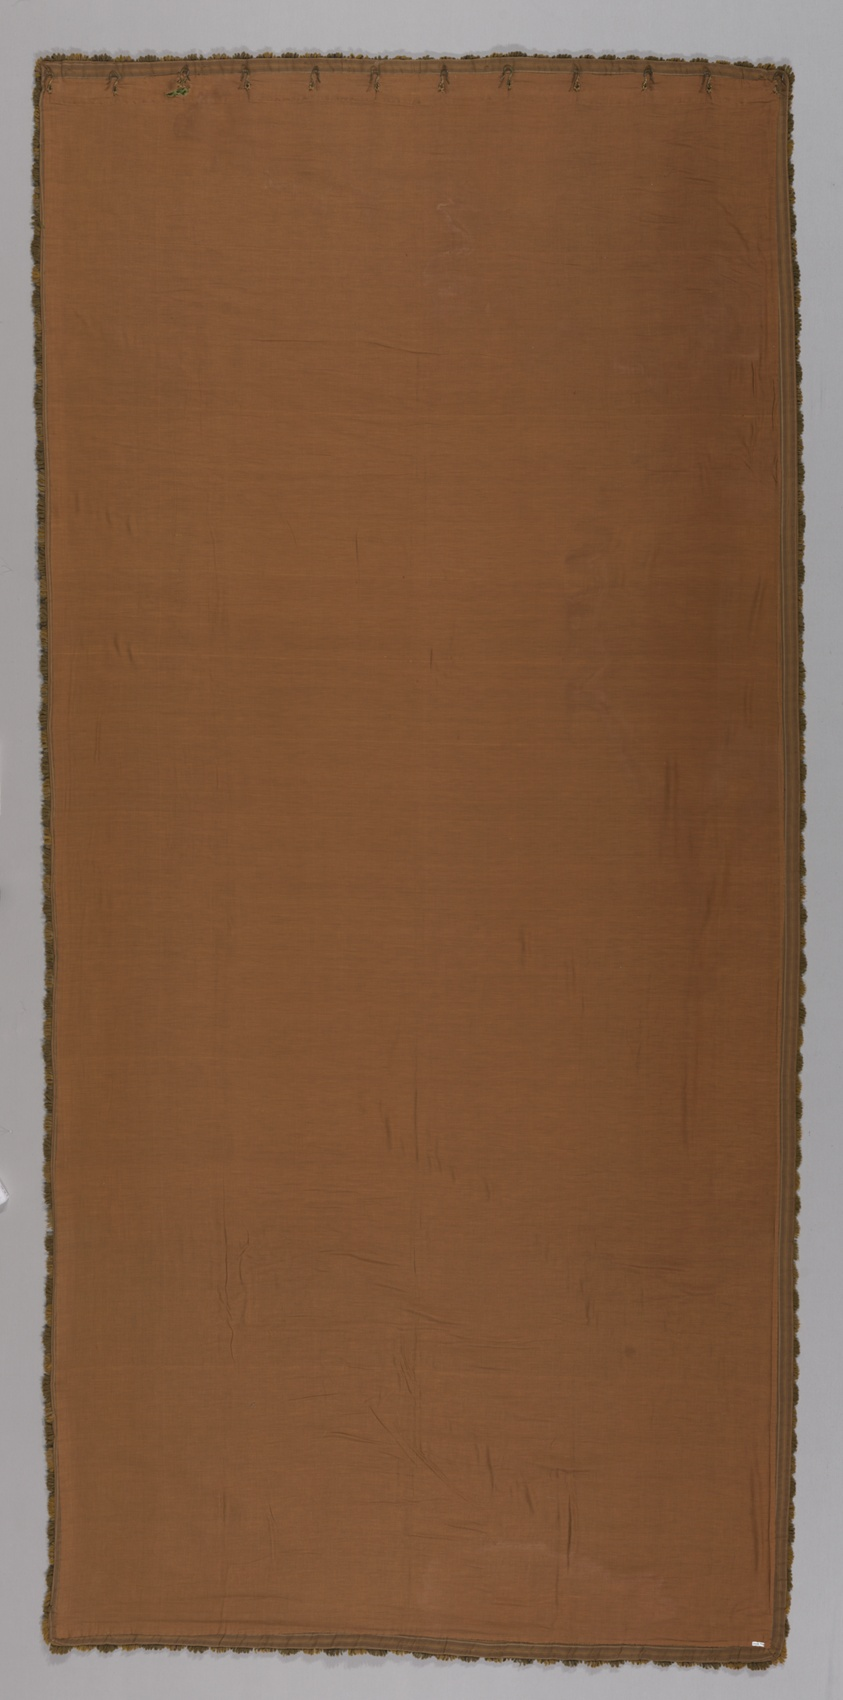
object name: Coverings and Hangings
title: Lined Curtain Panel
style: Arts and Crafts Movement, british, British Arts and Crafts Movement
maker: Design attributed to Bruce James Talbert (English, 1838-1881); Possibly manufactured by J. W. & C. Ward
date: Late 19th century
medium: Woven wool; cotton lining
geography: England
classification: weaving; textile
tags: foliage, floral motifs, flowers, fruit